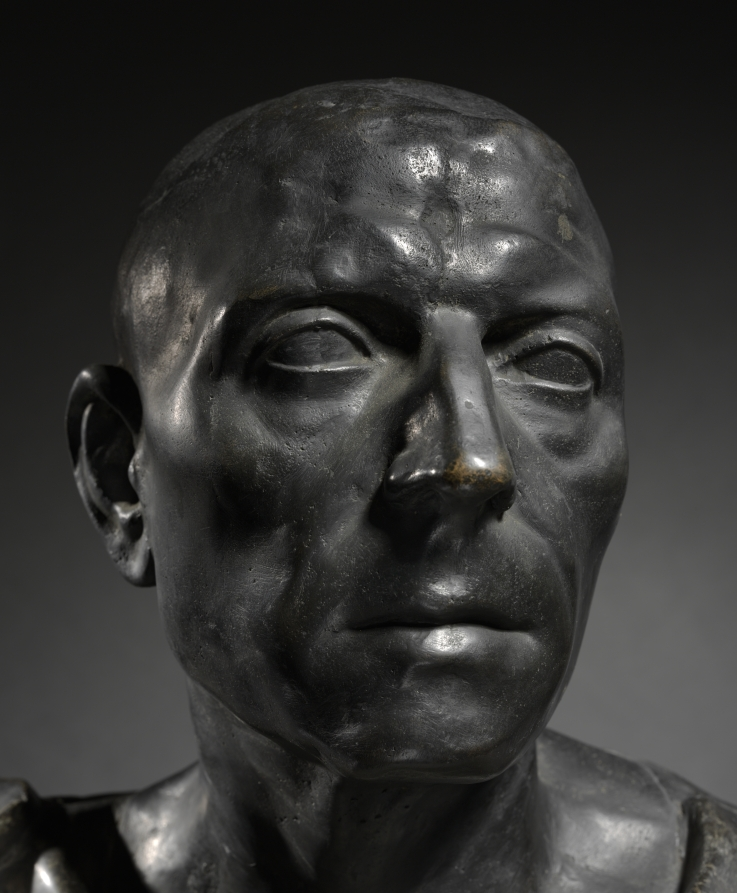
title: Bust of the Ludovisi Cicero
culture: Italy, 17th century or later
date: 1600s or later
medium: marble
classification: Sculpture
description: This work is a variant on the so-called Ludovisi Cicero, a bust in the Uffizi, Florence, that was long-believed to represent the famous Roman orator, but in fact appears to represent an unknown intellectual from the late Roman Republic or early Empire. This interpretation may date as late as the 20th century, and may have been assembled from separate parts.